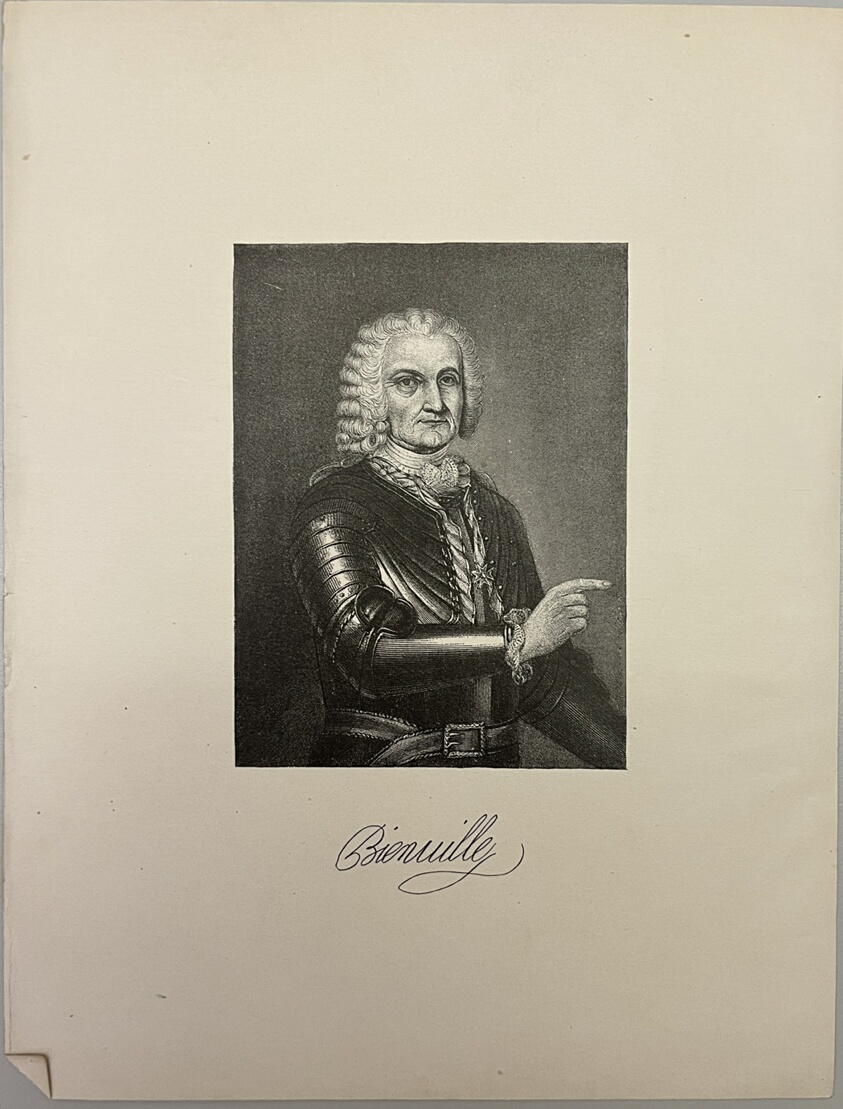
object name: Print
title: Bienville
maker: John Chester Buttre (American, 1821-1893); after Artist Unknown (American, 19th century)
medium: Photolithograph on paper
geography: United States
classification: reproduction; print; prints and drawing